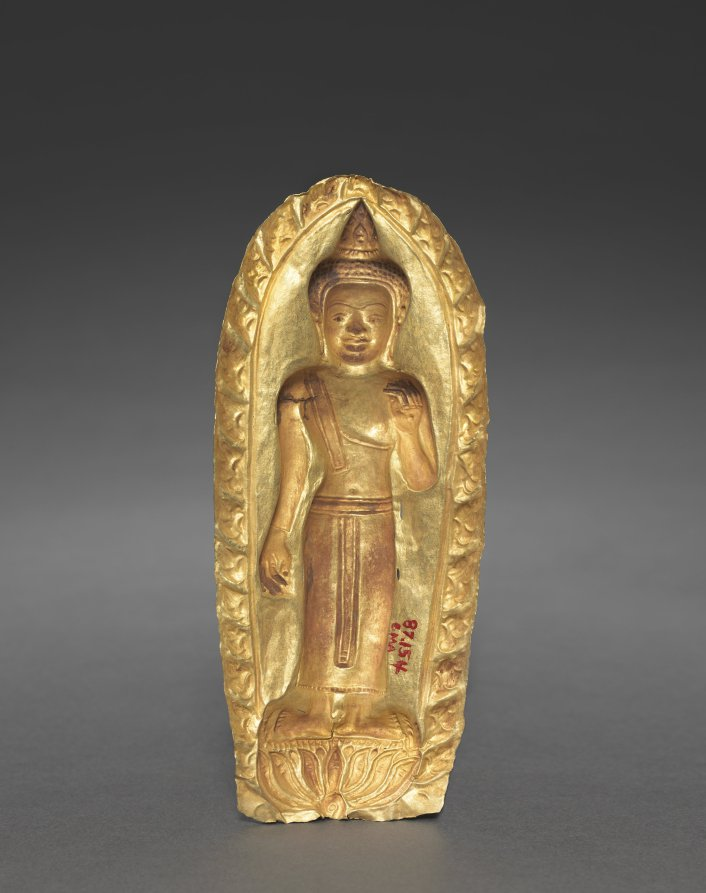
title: Standing Buddha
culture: Southern Myanmar (Burma), Pegu, or northwestern Thailand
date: 1100s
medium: gold repoussé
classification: Metalwork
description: Along with manuscripts, small-scale images of the Buddha could be commissioned by pilgrims or devotees and offered to a monastery in connection with a vow or the consecration of a sacred monument or object. The Buddha stands on a lotus flower that indicates his transcendence above ordinary beings. He is surrounded by flames that communicate his radiance and the intensity of the heat or power he acquired through meditation and discipline. His hands are in the mudra communicating the transmission of the teachings.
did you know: Pegu, the capital of the Mon empire, is on the south-central coast of Myanmar.